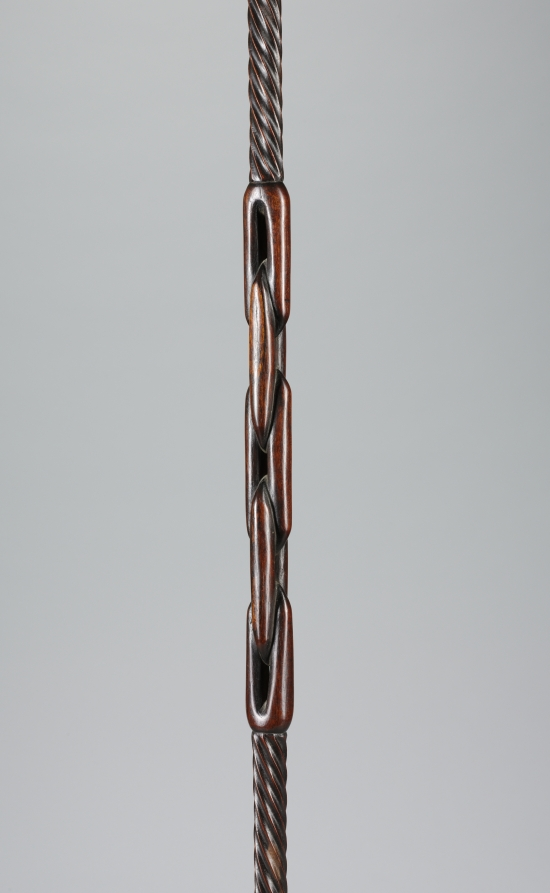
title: Prestige Staff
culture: Africa, Southern Africa, South Africa, Tsonga-style or Zulu-style maker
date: 1800s–1900s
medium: Wood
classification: Implements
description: The primary use of long staffs like this was purely practical; they served as walking companions when their pastoralist-owners covered long distances accompanying their cattle in search of new pastures. The tall height of this staff indicates the elevated status or special function of the man who owned it. Carved from one piece of wood, its spherical knob finial and the geometric designs incorporated into its shaft decoration—consisting of spiraling segments and chain links—demonstrate its maker’s superior skills.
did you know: Tsonga and Zulu staffs all have strong symbolic associations and value. They visually connect the identity of their owners with that of their ancestors and with that of the community to which they belong.